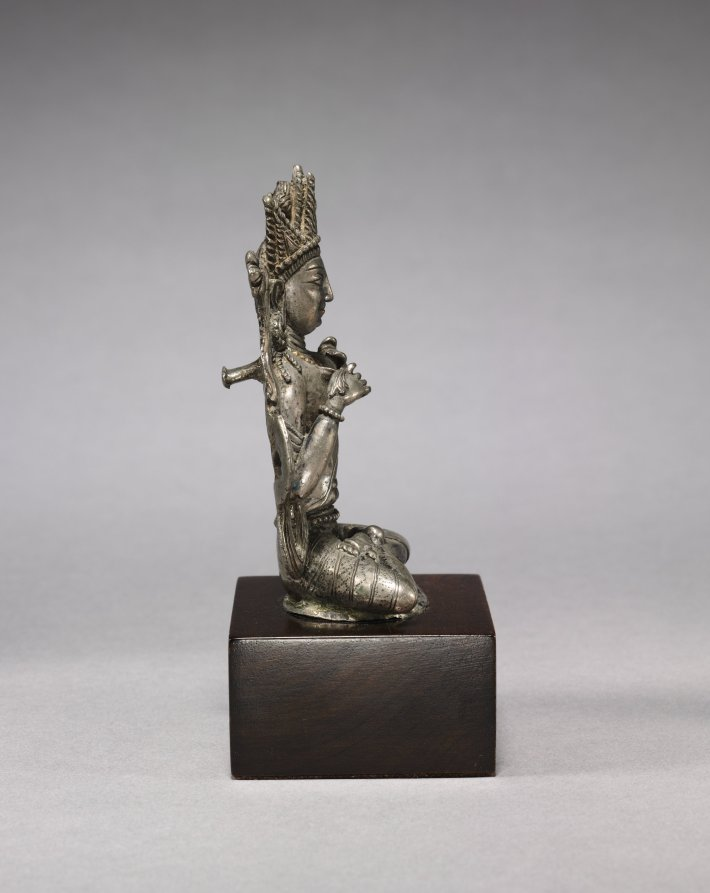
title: Bodhisattva Vajraraksha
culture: Western Tibet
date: c. 900s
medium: silver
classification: Sculpture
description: Once part of a set of sculptures depicting the enlightened beings who occupy a perfect world called the Diamond Realm (Vajradhatu), this figure holds the collar of his jacket in a gesture specific to him. An important practice in Tibetan Buddhism is the visualization of the Diamond Realm as described in texts and aided by artistic representations called mandalas. Bodhisattva Vajraraksha sits in the northern quadrant as a subsidiary figure to the Buddha Amoghasiddhi, who is green in color and quells fear.